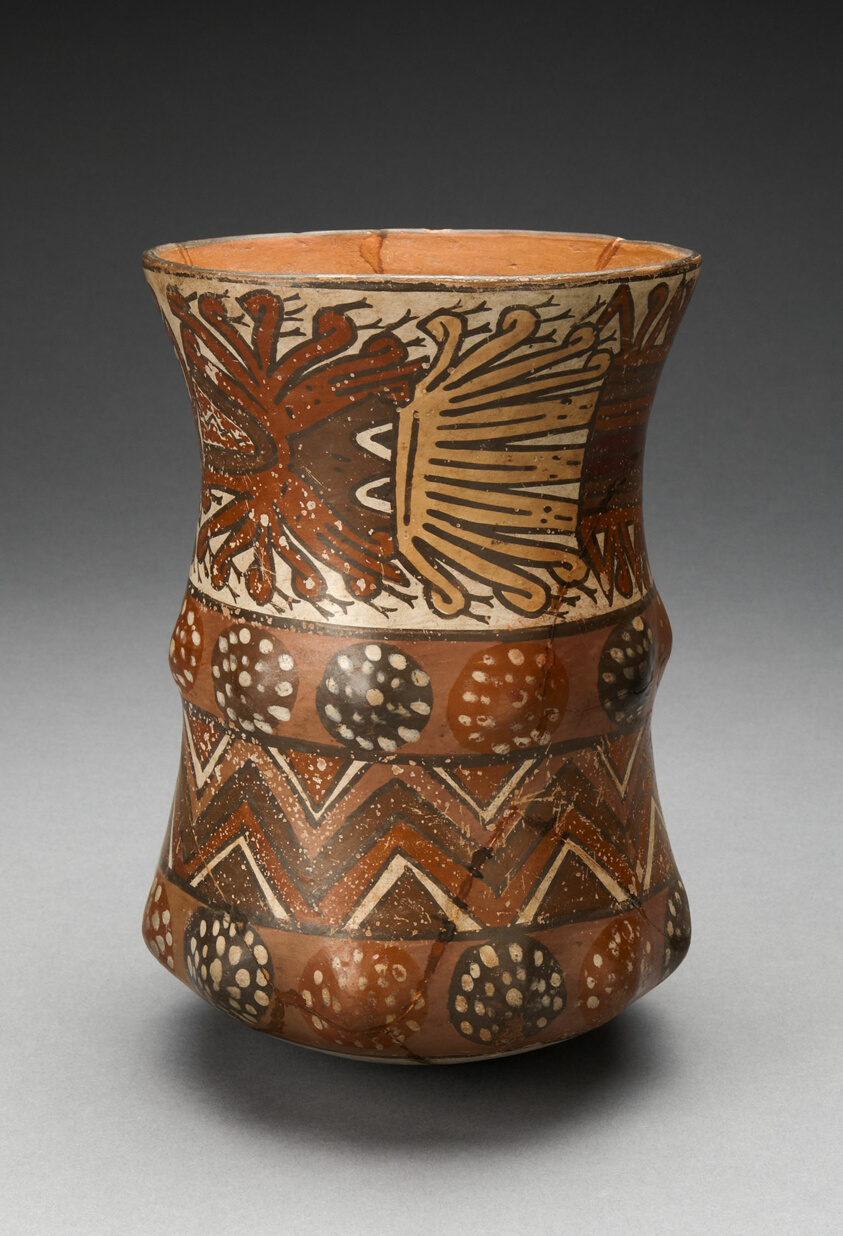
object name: Vessel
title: Curved Beaker with Rows of Abstract Masks and Geometric Motifs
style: nazca, early intermediate period, Pre-Columbian, americas, Arts of the Americas, andean, andes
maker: Nazca; South coast, Peru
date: 180 BCE–500 CE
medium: Ceramic and pigment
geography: Nazca Valley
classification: earthenware; art of the americas; ceramics; vessel